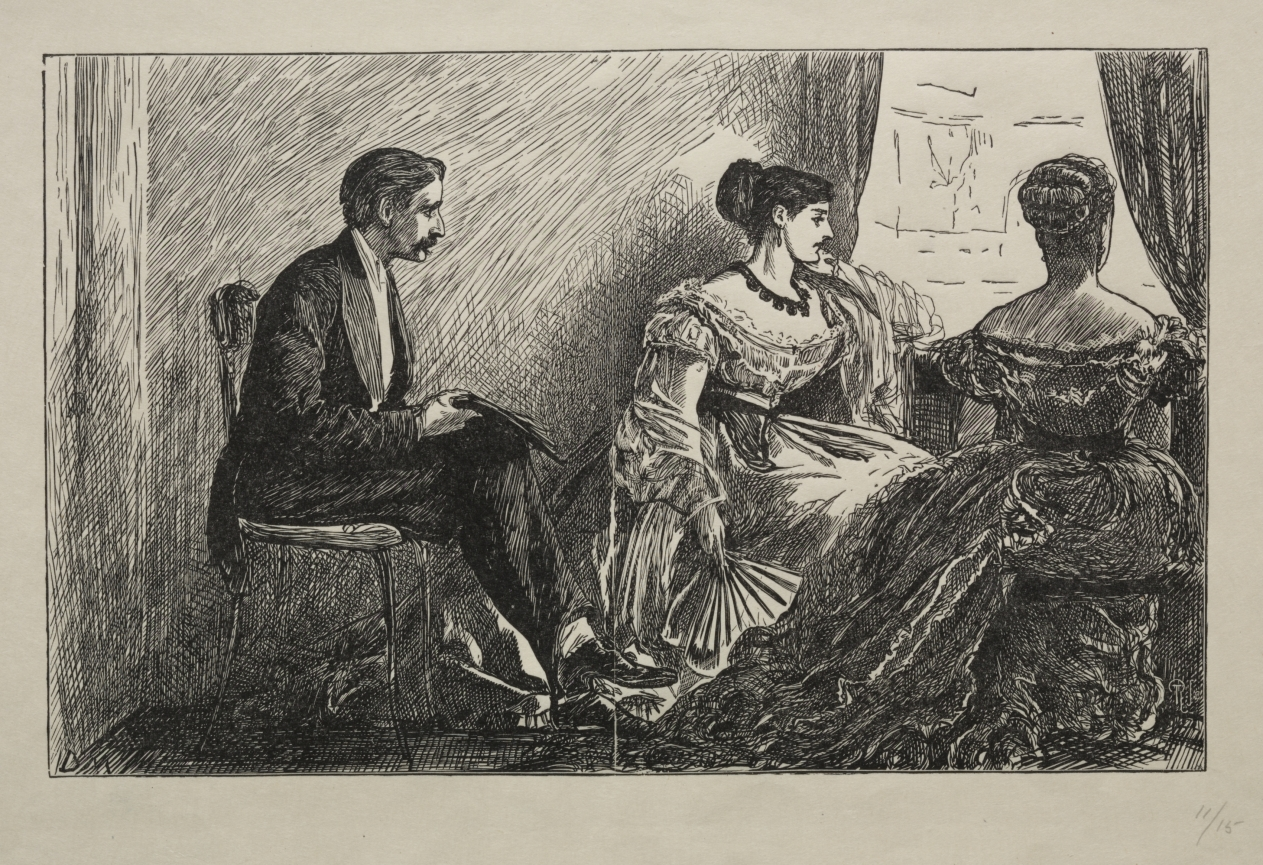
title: The White Camellia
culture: England, 19th century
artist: George Louis Palmella Busson Du Maurier (British, 1834–1896)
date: 1868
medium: wood engraving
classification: Print